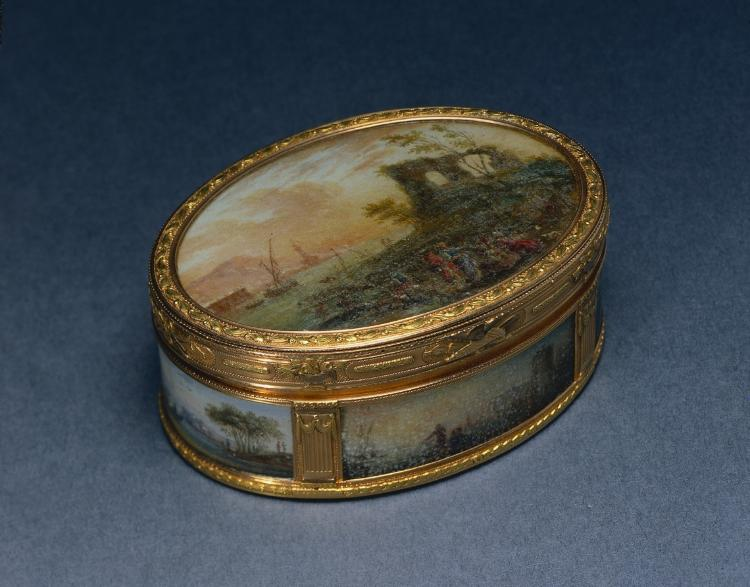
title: Snuff Box (Tabatière)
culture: France, 18th century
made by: Pierre-Nicholas Pleyard (French)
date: 1768–69; 1776–78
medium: gouache miniatures mounted on gold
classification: Metalwork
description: Snuff boxes were highly ornamented functional objects popular among French social elites. They were simultaneously containers for powdered tobacco and a means to communicate social and political status. Often decorated with miniature paintings inspired by popular paintings of the time, the works reproduced on this box are modeled after those of Claude-Joseph Vernet (cover and front panel) and David Teniers the Younger (base, side, and back panels).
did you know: These miniature paintings are mounted à cage, a practice popular in the mid-1700s that involved setting decorated panels into gold frames to create a box’s walls.